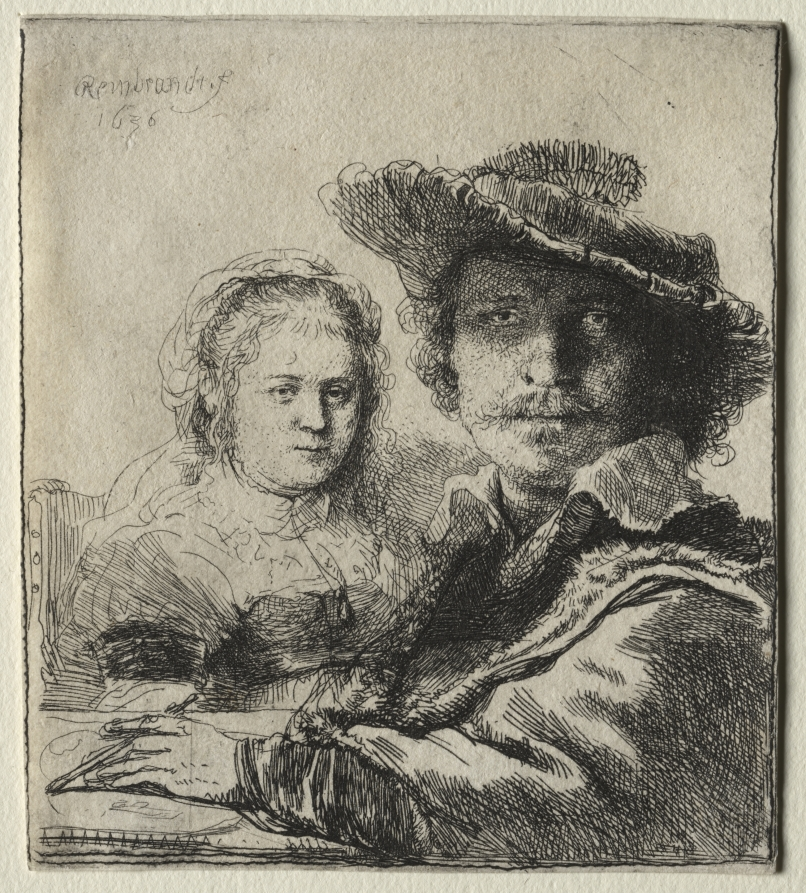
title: Rembrandt and His Wife Saskia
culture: Netherlands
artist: Rembrandt van Rijn (Dutch, 1606–1669)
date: 1636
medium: etching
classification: Print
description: This self-portrait is the only one in which Rembrandt showed himself with his young wife, Saskia. Both figures appear in formal attire and directly meet the viewer’s gaze. To represent himself, Rembrandt deeply etched the copper plate to create dark and decisive lines, as seen below his collar and on his left wrist. He etched Saskia’s image more lightly, with faint lines that situate her in the composition’s background. Rembrandt may have drawn the image at least in part while sitting in front of a mirror.